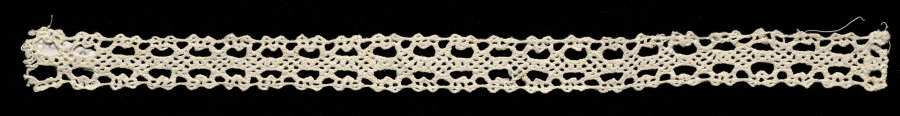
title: Lace Insertion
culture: Italy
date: 1600s–1700s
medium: Bobbin lace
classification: Lace